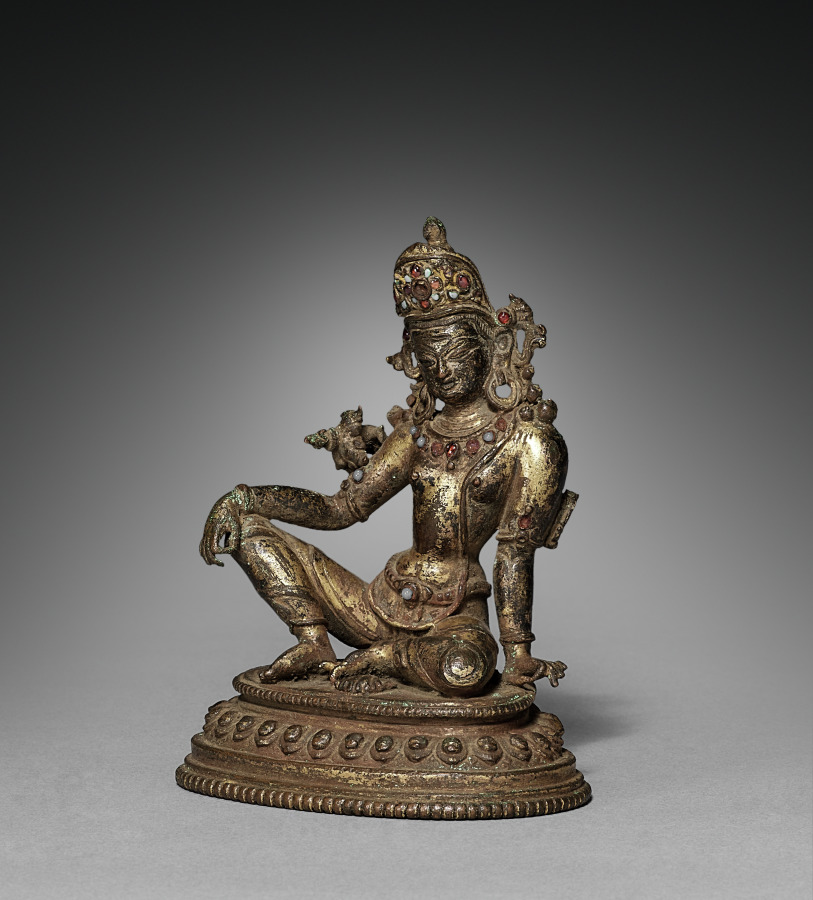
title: Avalokiteshvara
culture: Nepal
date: 1300s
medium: gilt bronze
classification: Sculpture